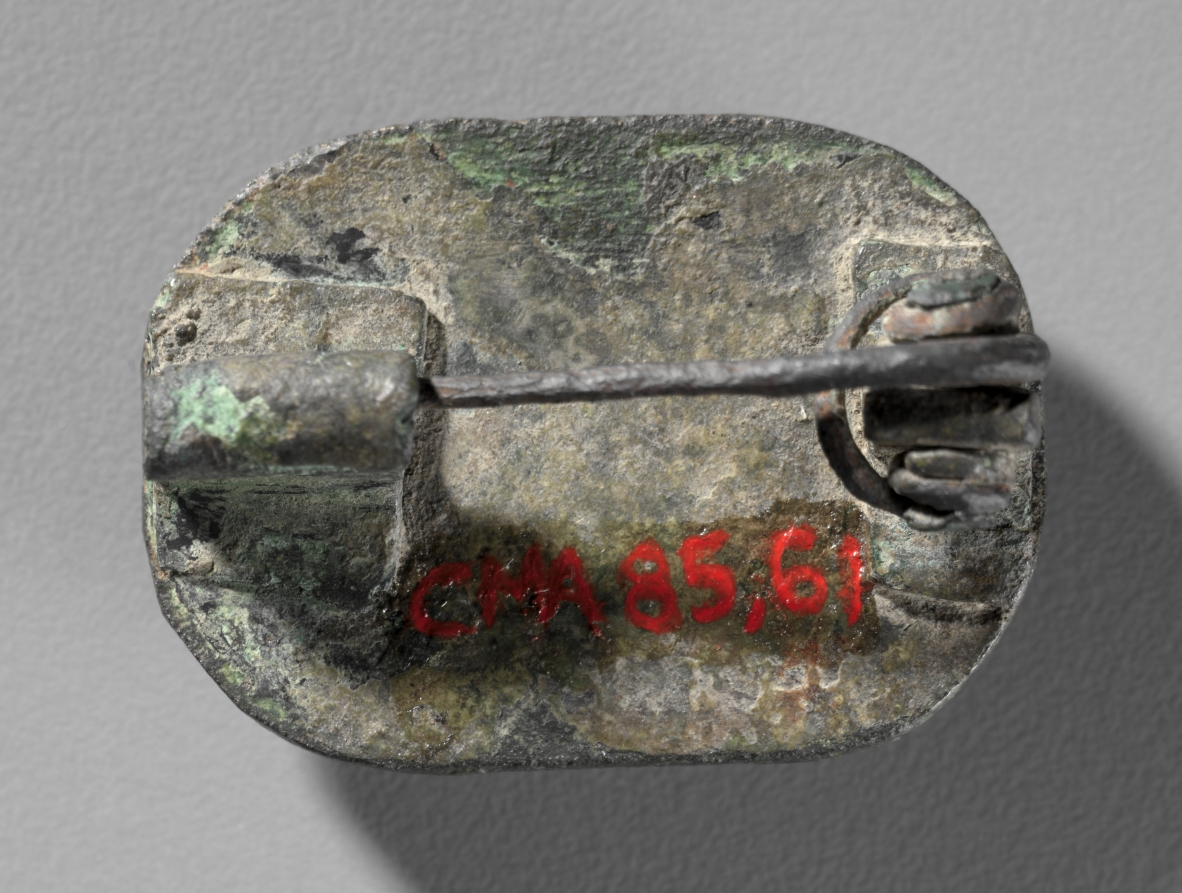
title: Votive or Civic Badge with a Crowned Figure Kneeling before Christ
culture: Italy, Venice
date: c. 1300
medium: gold repoussé medallion under glass inset within a bronze clasp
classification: Metalwork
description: This brooch was probably made to fasten a ceremonial cloak, and may have been intended as a diplomatic gift or memento. The central composition parallels the main face of the famous gold coin, a ducat, of the Venetian Doge Giovanni Dandolo minted in 1288-1289. Unlike the coin, the medallion is neither struck or diecast; it is tooled and chased, making it one of a kind.